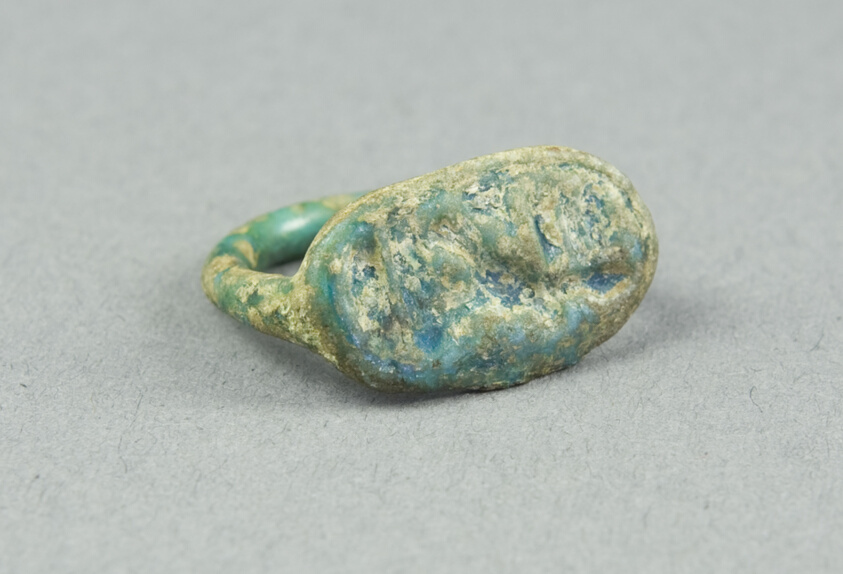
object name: Costume and Accessories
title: Ring: Horemheb, Beloved of Amon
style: eighteenth dynasty, new kingdom, egyptian, ancient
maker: Egyptian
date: New Kingdom, Dynasty 18, reign of Horemheb (about 1323–1295 BCE)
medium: Faience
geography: Egypt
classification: ring (jewelry); ceramics; jewelry; ancient art; costume; faïence (composite material)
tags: Hieroglyphs